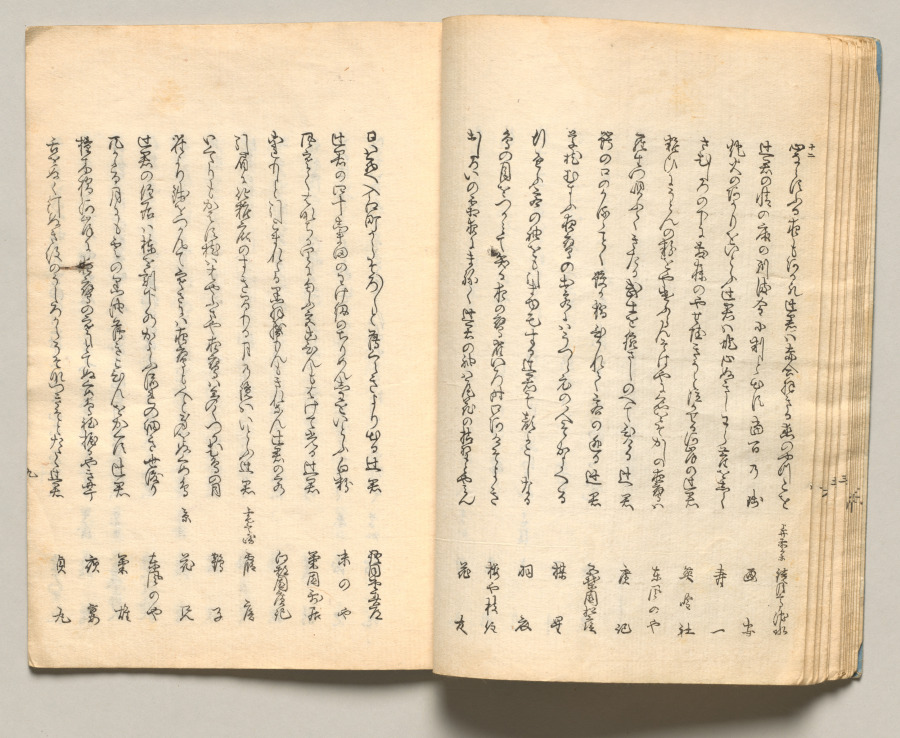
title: Spread Sixteen from Volume Three of People of Japan in Light Verse (Kyōka)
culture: Japan, Edo period (1615–1868)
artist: Utagawa Hiroshige (Japanese, 1797–1858)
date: 1857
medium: Woodblock-printed book; ink and color on paper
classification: Bound Volume